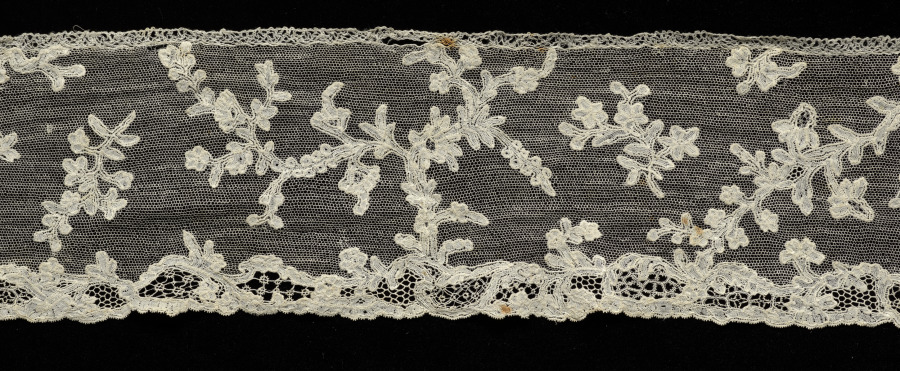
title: Lace Edging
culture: Italy, Burano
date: 1740–60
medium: Linen: needle lace (Burano Point)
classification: Lace